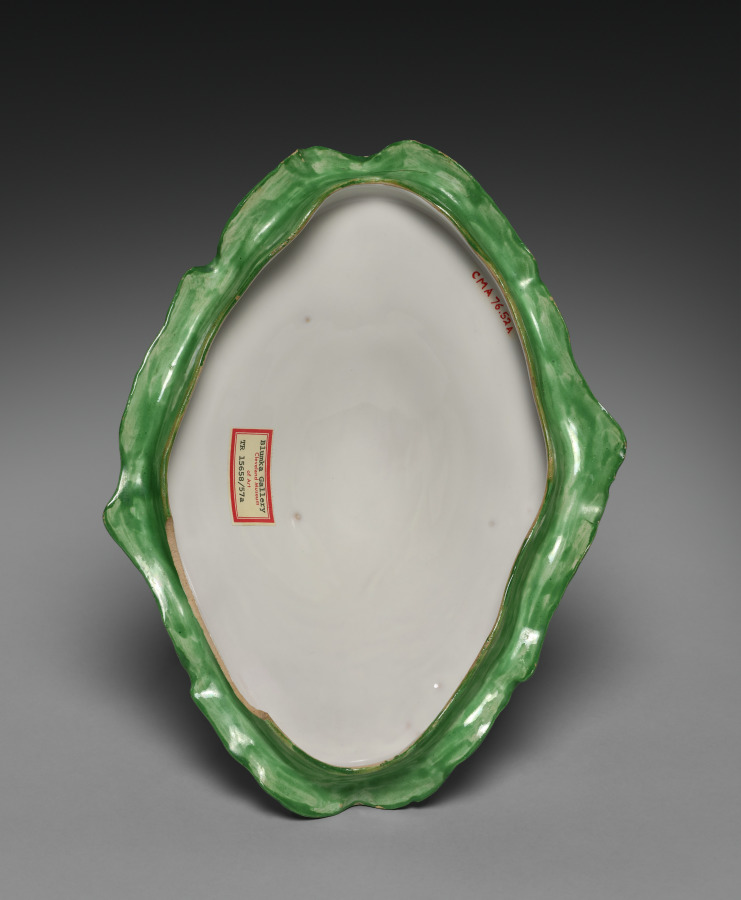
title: Cover for a Tureen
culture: France, Strasbourg, 18th century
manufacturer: Paul Hannong Factory (French)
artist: Strasbourg Factory (France)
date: c. 1750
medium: tin-glazed earthenware (faience) with enamel decoration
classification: Ceramic